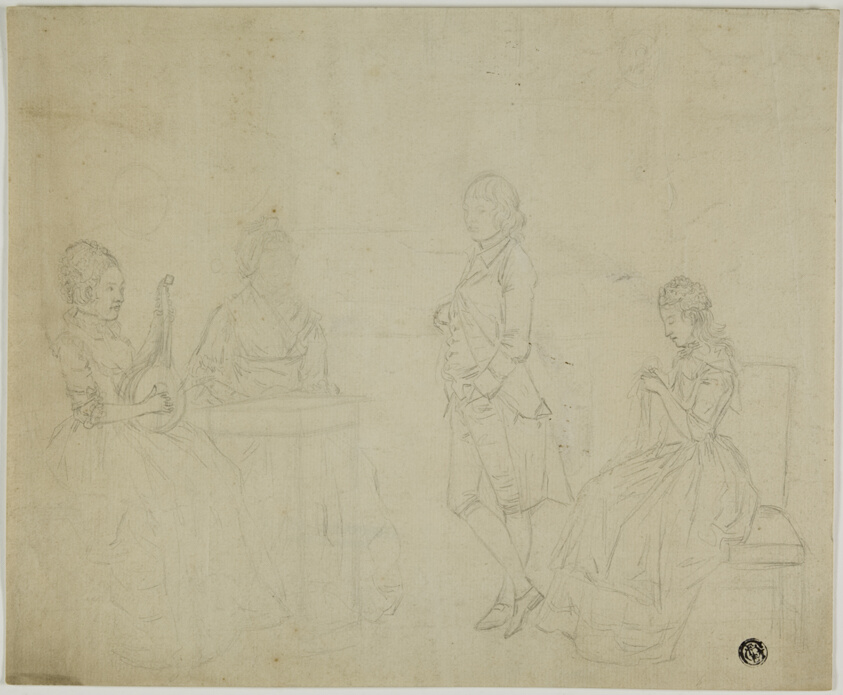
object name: Drawing and Watercolor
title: Sketch of Family Group with Three Seated Women and Young Man Standing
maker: Unknown German Artist; or possibly Johann Friedrich August Tischbein (German, 1750-1812)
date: 18th century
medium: Graphite on cream laid paper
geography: Germany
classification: graphite; drawings (visual works); prints and drawing